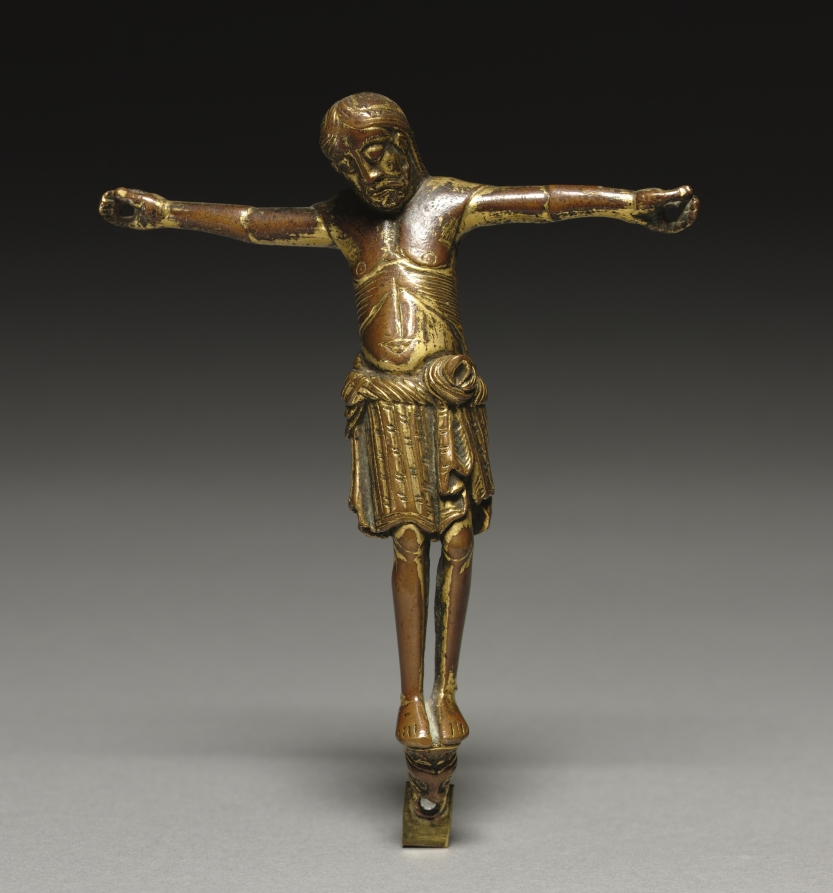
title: Crucified Christ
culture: Germany, Rhine Valley, Romanesque period, early 13th century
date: c. 1200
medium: gilt bronze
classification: Sculpture